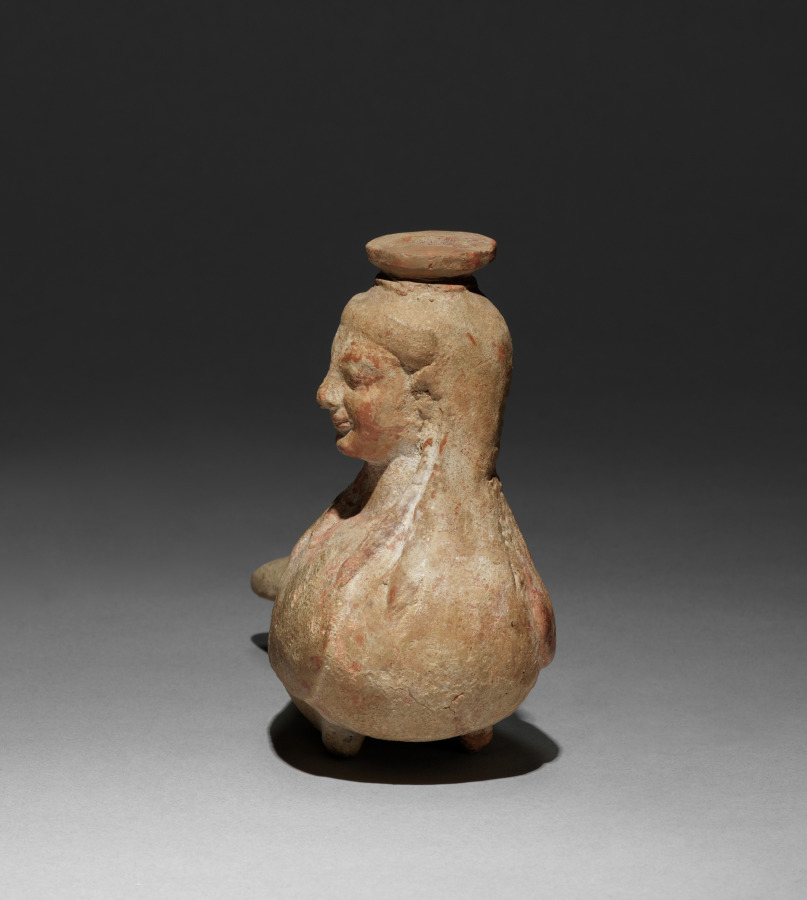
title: Siren-Shaped Perfume Flask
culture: Greece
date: 600–480 BCE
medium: terracotta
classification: Sculpture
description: A half-bird, half-woman creature, a siren lured sailors to death by the sweetness of her song. The most famous sirens appear in the ancient epic the Odyssey. Shaped like a siren, this vessel likely held valuable perfumed oil. Its small mouth limited spillage, and a string attached to the loops on its back allowed it to hand or hold a stopper.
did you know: In the Odyssey, Odysseus’s crew escapes the sirens by plugging their ears with wax.